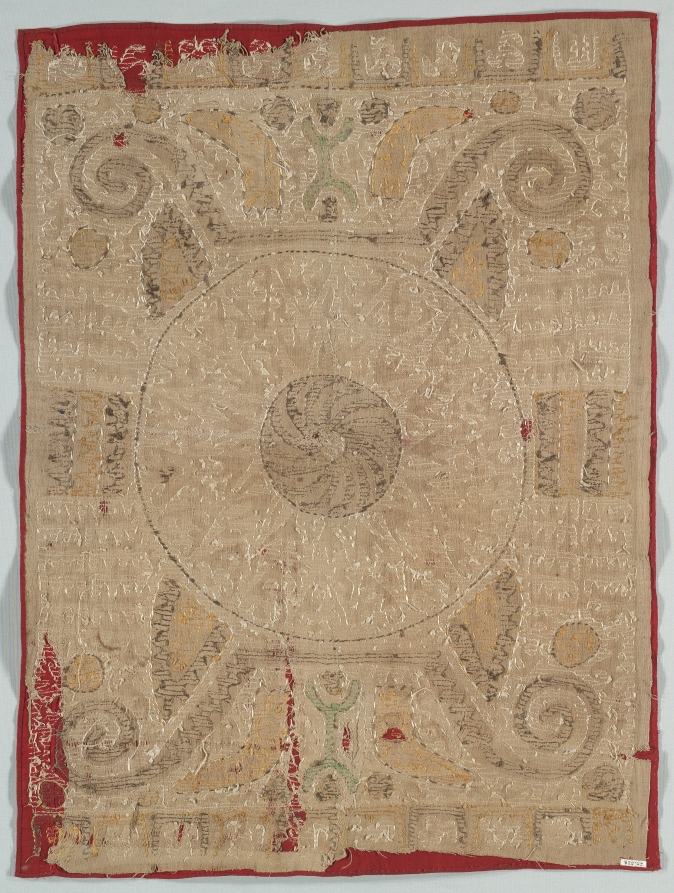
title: Cushion Cover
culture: Dagestan, 18th century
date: 1700s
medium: embroidery, silk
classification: Embroidery